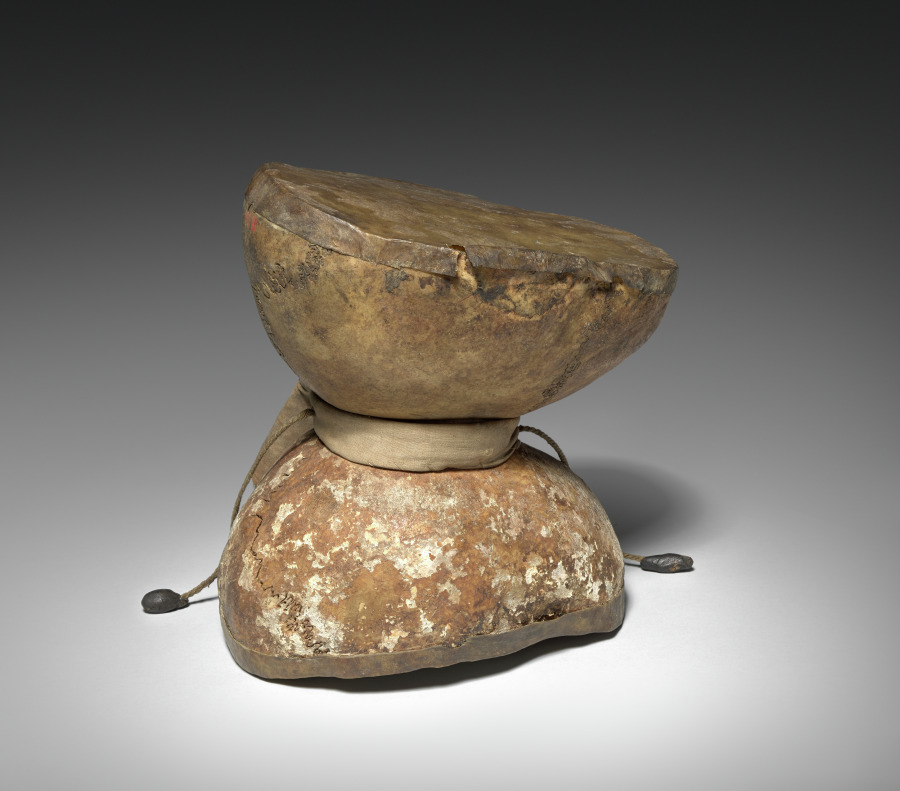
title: Ritual Drum (damaru)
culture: Tibet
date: c. 1800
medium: skull bone, cloth, hemp fiber, leather, and skin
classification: Musical Instrument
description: Damaru drums are made from the tops of two skulls joined in the center and sounded by rapidly turning it side to side so the ends of the cords fly up to sound against the stretched skin. In Hindu and Buddhist rituals, the rhythm of the damaru references the ongoing, relentless beat of time. The material of bone reminds practitioners of the inevitability of death in the course of time.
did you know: Dancing Shiva, in his form as Nataraja, holds a damaru in one hand.